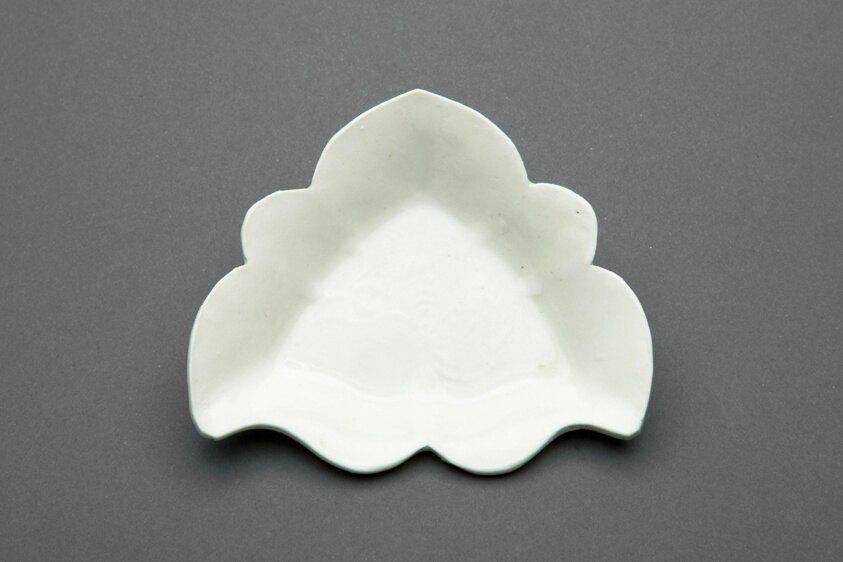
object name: Decorative Arts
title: Tri-Lobed Dish with Butterfly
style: Chinese (culture or style)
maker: China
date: Liao dynasty (907–1125), 12th century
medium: Ding ware; glazed porcelain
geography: China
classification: dish (vessel); decorative arts